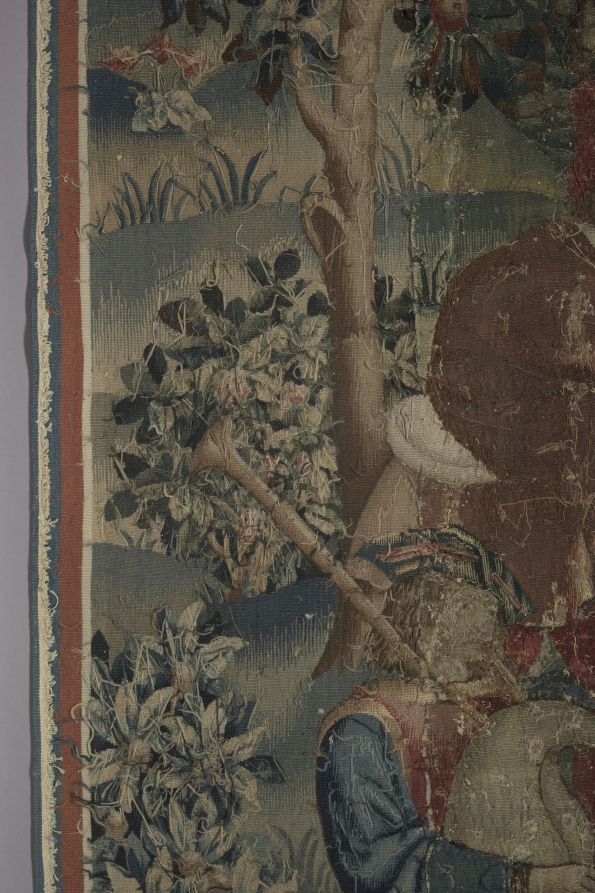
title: Shepherds in a Round Dance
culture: Netherlands, early 16th century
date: around 1500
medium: Wool and silk: tapestry weave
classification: Tapestry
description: Late medieval tapestries often use a limited yet contrasting color palette to portray stylized images. The expressions of these figures, for example, are conveyed more by their postures than by their faces. Four shepherds and shepherdesses join hands and dance to the music of a bagpiper at the far right, while a lord and two ladies on the left look on. A dog and sheep amid blossoming plants and trees contribute to the festive pastoral scene in front of a castle.